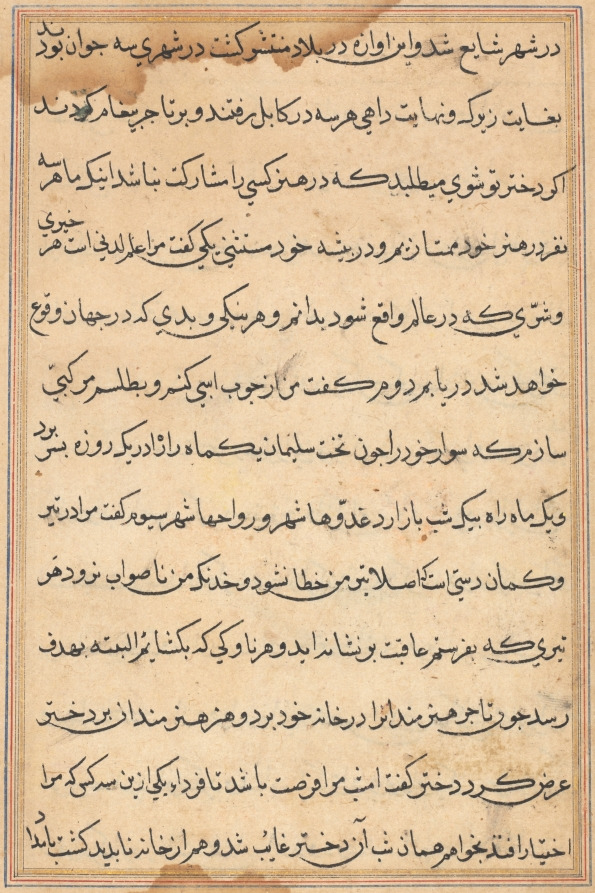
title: Page from Tales of a Parrot (Tuti-nama): text page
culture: Mughal India, court of Akbar (reigned 1556–1605)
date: c. 1560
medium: gum tempera, ink, and gold on paper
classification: Painting